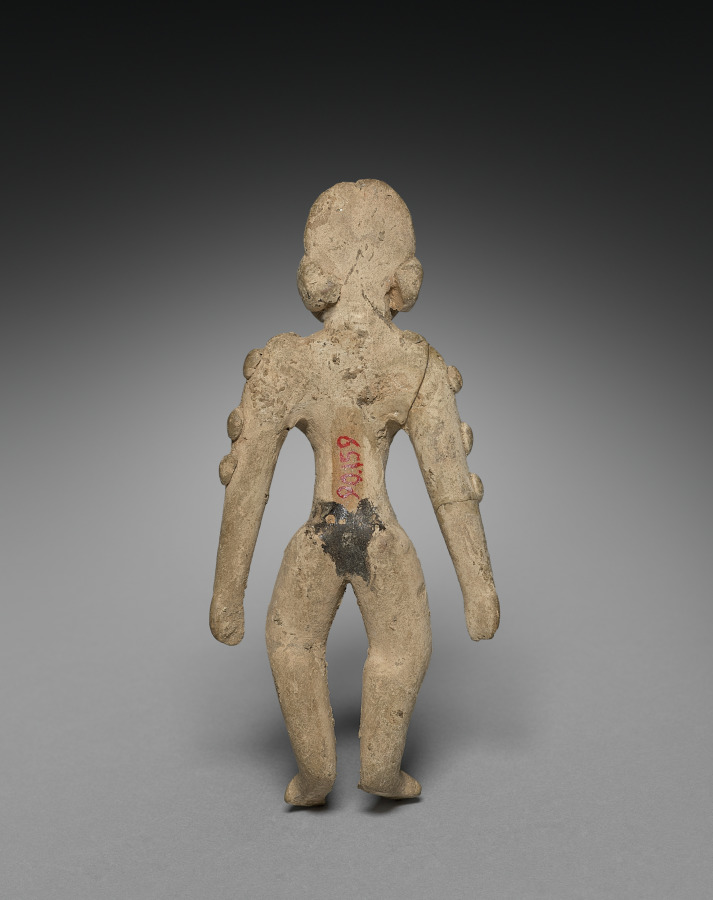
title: Female Figurine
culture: Mesoamerica, Veracruz, Huastec, Panuco Style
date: 300–600 CE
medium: ceramic, pigment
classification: Sculpture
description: Clay was a major medium in ancient Veracruz, located on Mexico’s Gulf Coast, and artists used it to create huge quantities of sculpture ranging from small whistles and figurines like this one to impressive, life-size figural effigies. Meanings are often obscure, but small objects were important enough to have been deposited in tombs and buried offerings.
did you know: Clay figurines were the earliest and most common art form in the ancient Mesoamerican culture region.